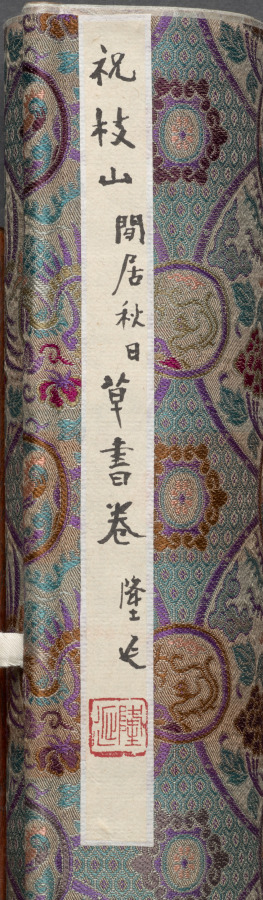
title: Retreat on an Autumn Day, in Cursive Script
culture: China, Ming dynasty (1368–1644)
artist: Zhu Yunming (Chinese, 1460–1527)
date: dated 1523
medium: Handscroll; ink on paper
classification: Calligraphy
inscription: 款識：讌於從一堂，爛漫醉書。癸未（1523）七月晦日也。枝山允明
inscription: 《閒居秋日》逃暑應能蹔閉關，未消多把古賢攀。並拋杯酌方為懶，少事篇章恐礙閑。風墮一庭鄰寺葉，雲開半面隔城山。浮生只說潛居易，隱比求（脫「名」）事更艱。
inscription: 《句曲道中》老至誰憐晝錦明，春來聊得客襟清。宵依星斗宮壇臥，曉（脫「入」）神仙宅舍行。眼看山多城郭少，肩挑詩重簿書輕。何時總入煙霞去。不見人間寵辱驚。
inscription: 《登茆峰》下馬門前一振衣，翠微高迥逼清微。雲端洞裡仙人過，月下山中長史歸。金焰暈牀砂氣伏，紫雲穿竇朮芽肥。神方能詠不能遇，一夜爽靈峰外飛。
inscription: 鈐印：「晞哲」、「允明」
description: This masterwork of calligraphy by Zhu Yunming from Suzhou combines two poems by the artist in cursive script style, characterized by its uninhibited, swift, and intuitive brushwork, so powerful that it here dissolved characters into dots or lines. Written from right to left and top to bottom and alternating in light dry to deep saturated ink, single characters may take a whole column or extend into the next one. Following the movement of the brush, they seem to dance over the paper.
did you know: Zhu Yunming stated that he was in an inebriated state when he created this work.